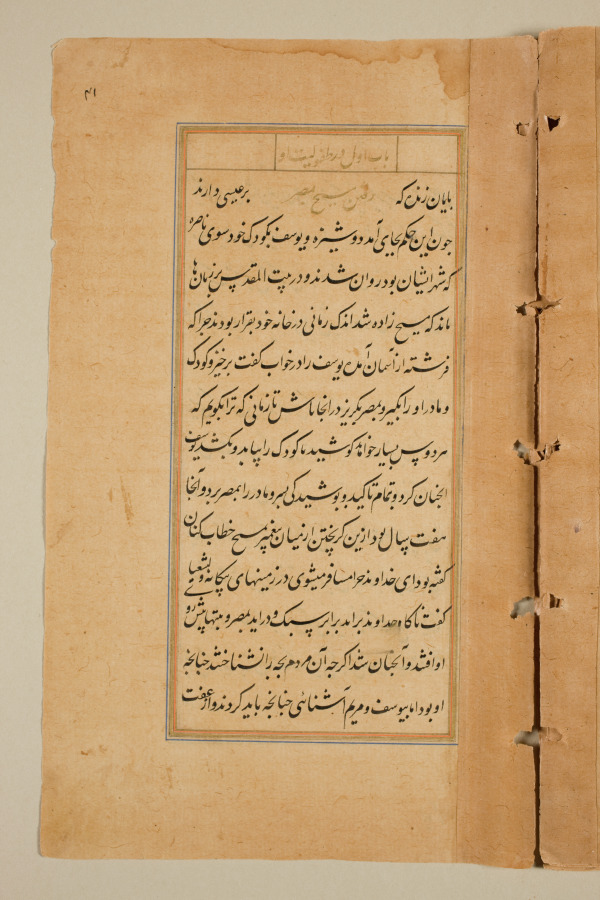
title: Text page from a Mirror of Holiness (Mir’at al-quds) of Father Jerome Xavier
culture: Mughal India, Allahabad, made for Prince Salim (1569–1627)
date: 1602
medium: Ink and gold on paper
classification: Manuscript